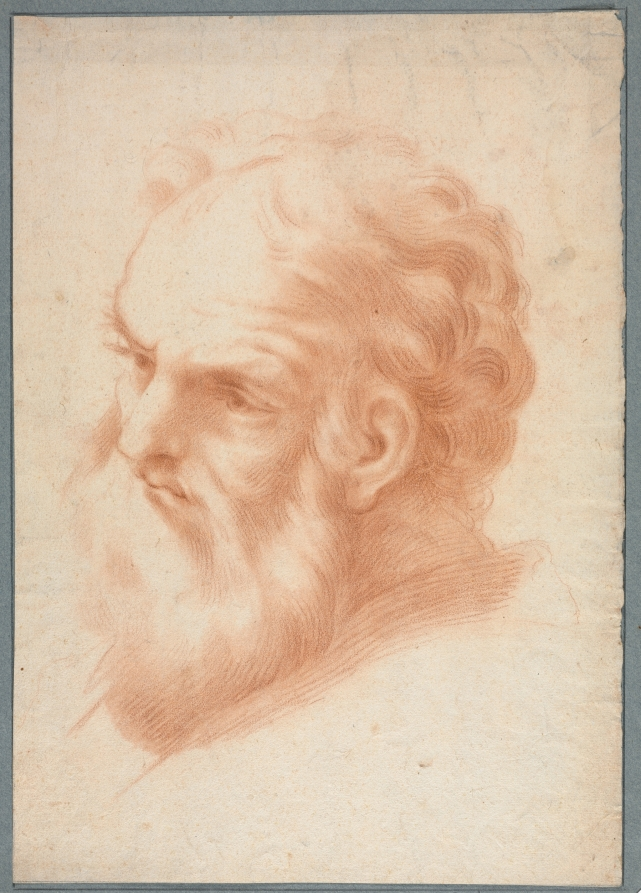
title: Head of an Old Man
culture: Italy, 18th century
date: 1700s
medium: red chalk (stumped); framing lines in graphite (left, bottom)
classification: Drawing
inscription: SECONDARY SUPPORT, lower right, in black ink: Federico Barocci, ; lower right, in graphite: no good ; lower right, in graphite: 5.00